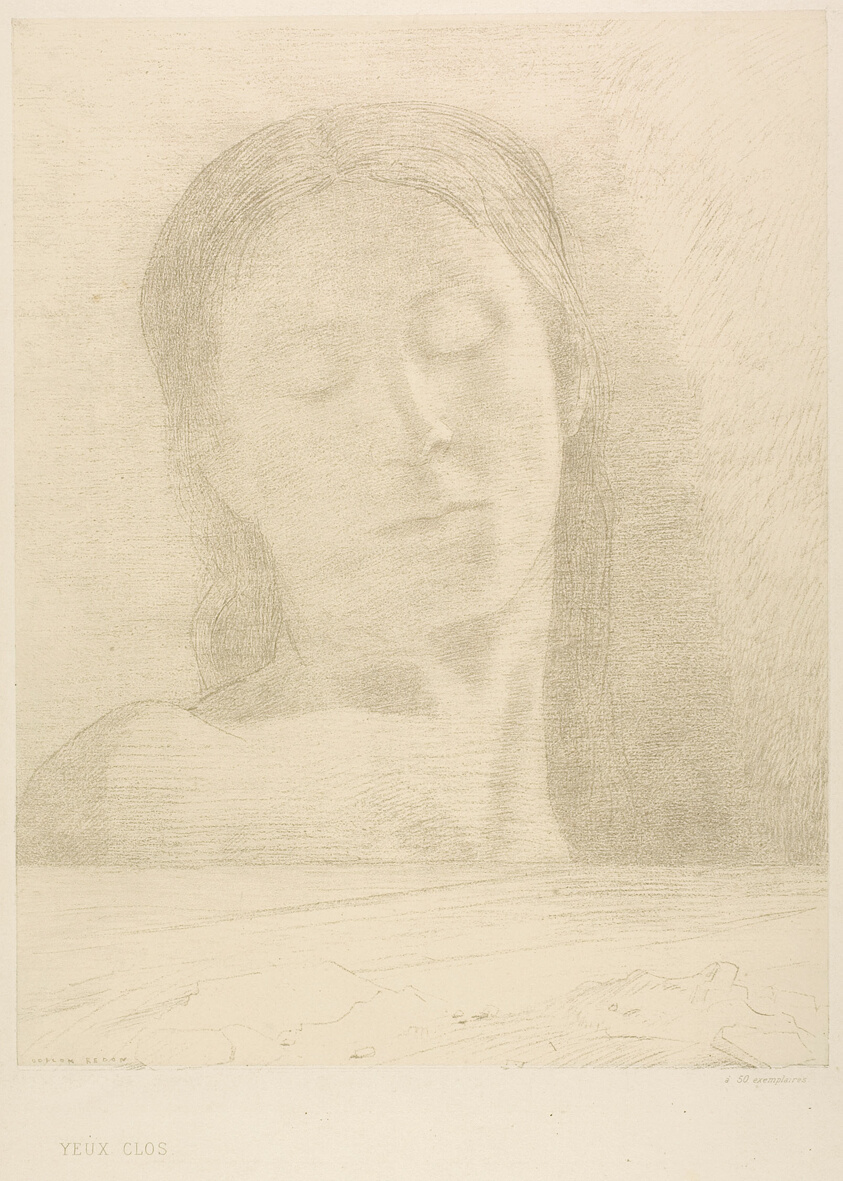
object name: Print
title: Closed Eyes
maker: Odilon Redon (French, 1840-1916)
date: 1890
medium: Lithograph in gray-green on cream China paper laid down on ivory wove paper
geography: France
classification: lithograph; print; prints and drawing; paper